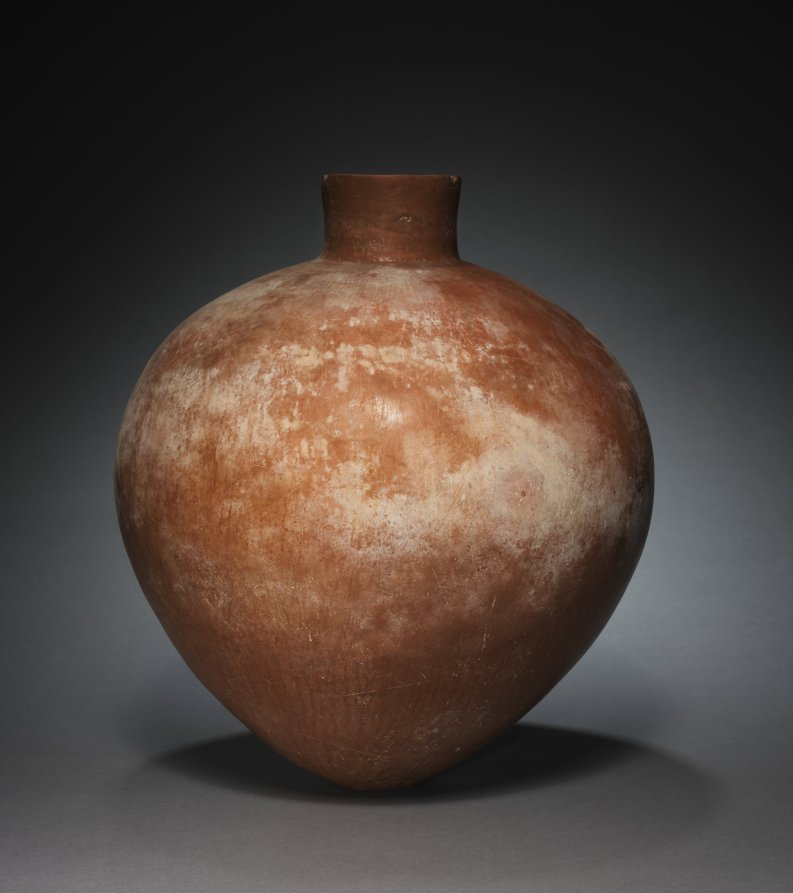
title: Red-Burnished Jug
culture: Iran, Amlash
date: 1000–700 BCE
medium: earthenware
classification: Ceramic